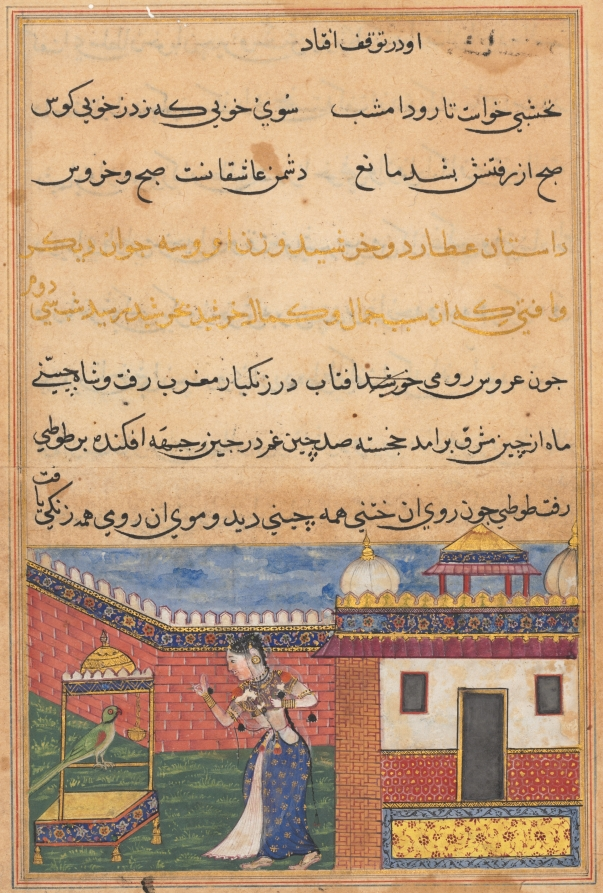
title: The parrot addresses Khujasta at the beginning of the thirty-second night, from a Tuti-nama (Tales of a Parrot)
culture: Mughal India, court of Akbar (reigned 1556–1605)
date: c. 1560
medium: gum tempera, ink, and gold on paper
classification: Painting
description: Before Khujasta can sneak away to meet with her lover, Tuti the parrot begins to tell her a story about a man named Utarid and his wife, Khurshid, who encountered many misfortunes because of her great beauty.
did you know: Utarid is the name of the planet Mercury, while Khurshid is one of the names of the sun.